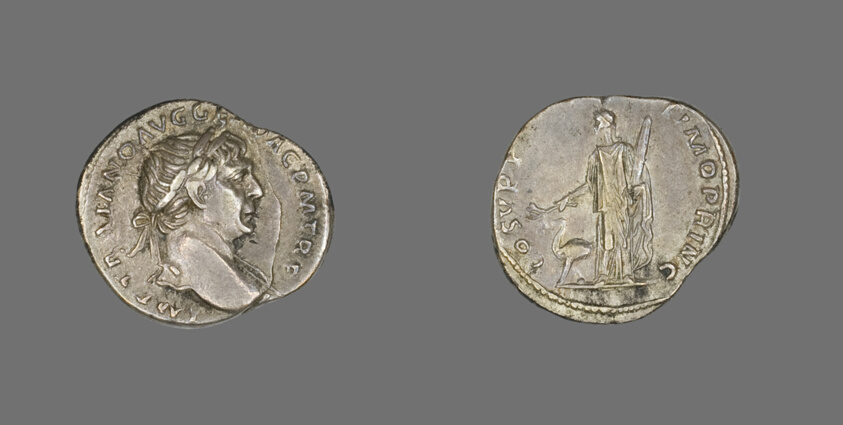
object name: Coin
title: Denarius (Coin) Portraying Emperor Trajan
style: roman (ancient, style or period)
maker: Roman, minted in Rome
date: 98-117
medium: Silver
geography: Roman Empire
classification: coin; ancient art